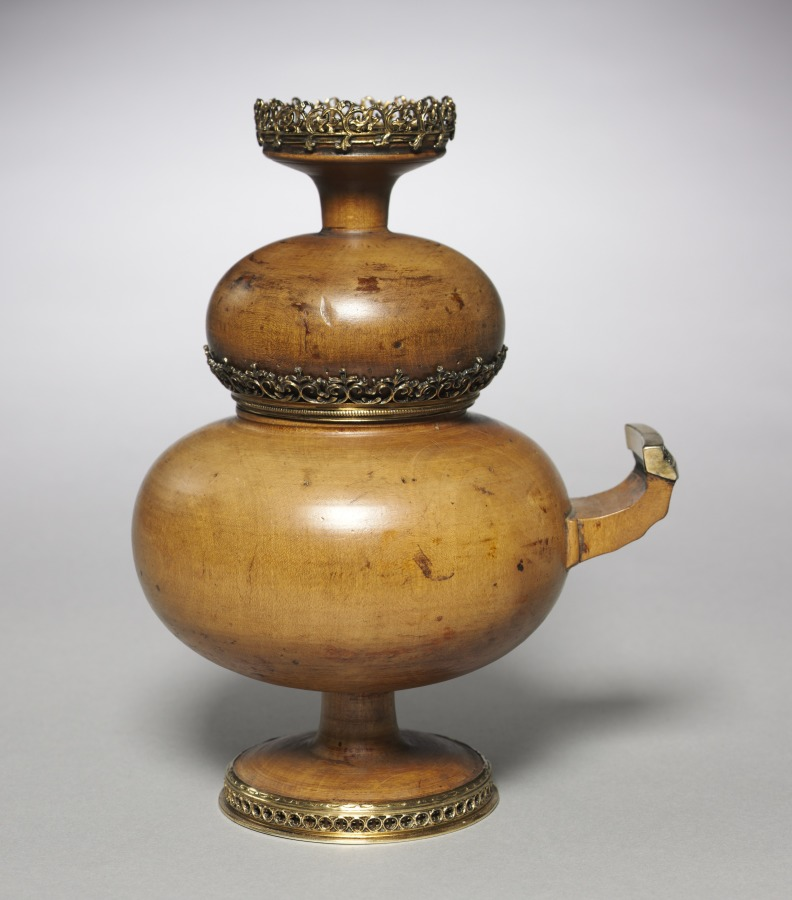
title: Double Cup (Mazer)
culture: Germany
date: c. 1530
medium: maple wood with gilt-silver mounts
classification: Wood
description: A characteristic form of drinking vessel made of close-grained wood, especially maple, was developed in Germany as early as the thirteenth century. It consisted of a larger cup with a foot and a handle and a smaller cup on top. The upper one served as a lid but could also be removed and used as a separate drinking vessel. In this example the smaller upper cup is inset with a memorial portrait medallion of Albrecht Dürer made in the year of his death, 1528. The medal is the work of Matthes Gebel who was active in Nuremberg and Augsburg as a medallist from 1523 to his death in 1574. The reverse of the medal is set into the base of the larger lower cup.